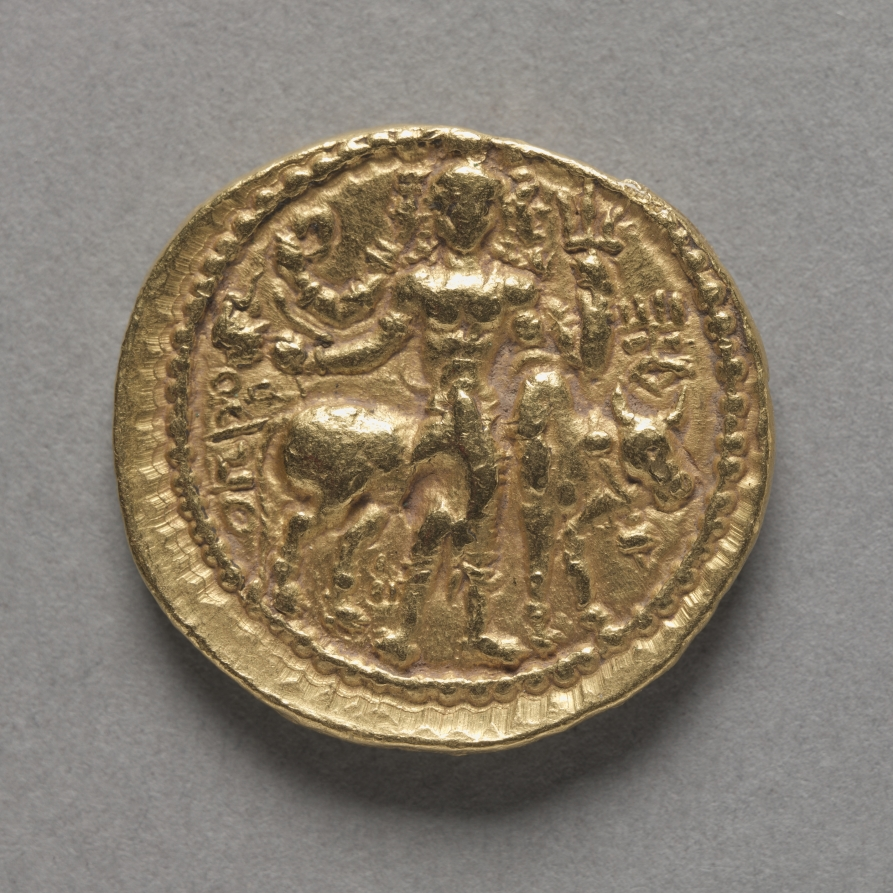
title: Coin of Kushan King Vasudeva I (reverse)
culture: India, Mathura, Kushan period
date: c. 142/145+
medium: gold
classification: Coins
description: This gold coin represents the reign of the Kushana ruler, Vasudeva I. The coin bears a portrait of the ruler on the obverse and various deities on the reverse. It is identified by inscriptions in Kharosthi, the language used in northwestern India during the Kushan period.